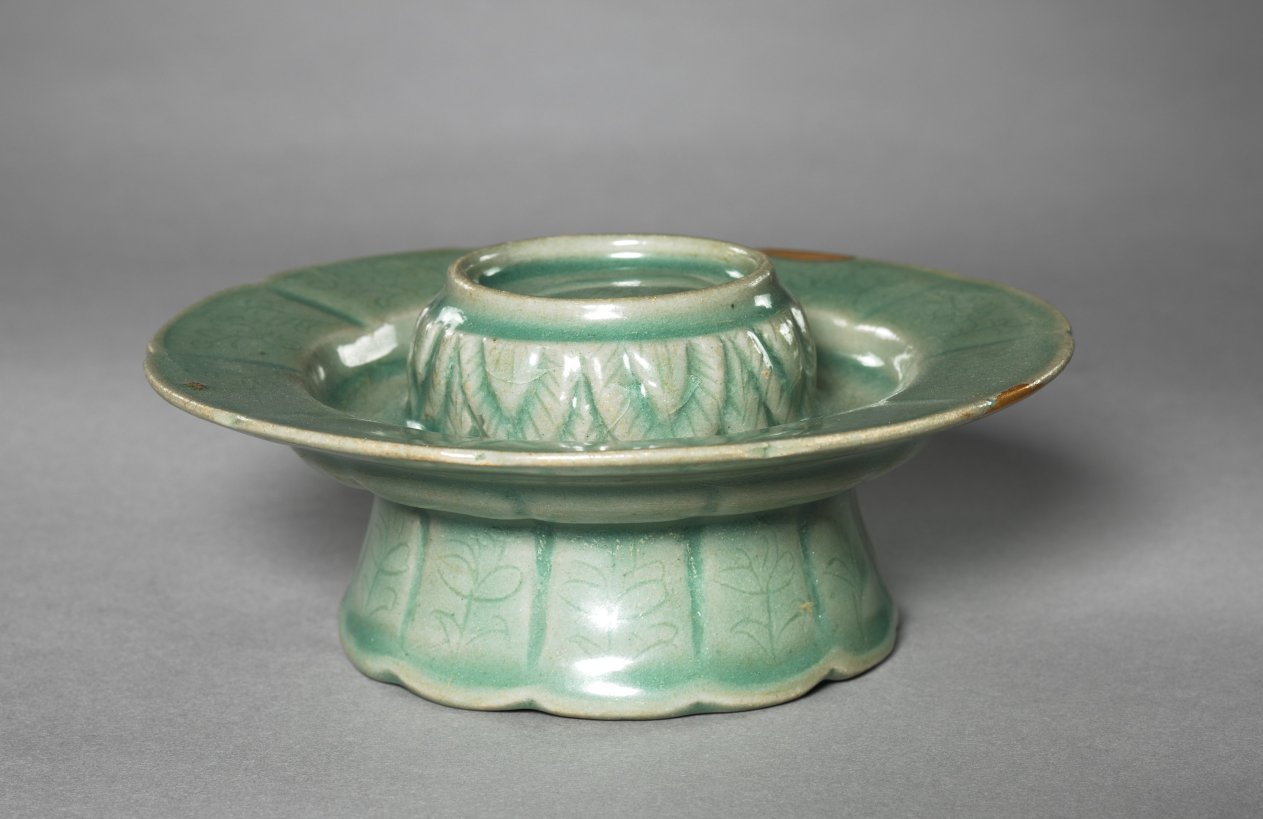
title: Floral-shaped Cup Stand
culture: Korea, Goryeo dynasty (918–1392)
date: 1100s-1200s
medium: celadon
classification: Ceramic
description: As early as the seventh century, the practice of drinking tea became an important part of elite culture in Korea. In enjoying teas, elites commissioned a variety of types of utensils and vessels including this delicate-looking cup stand, not only to make their tea-drinking experience more exciting, but also to show their refined taste.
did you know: According to a historical record, the cultivation of tea in Korea was initiated with green tea plant seeds from China by royal order in 828.